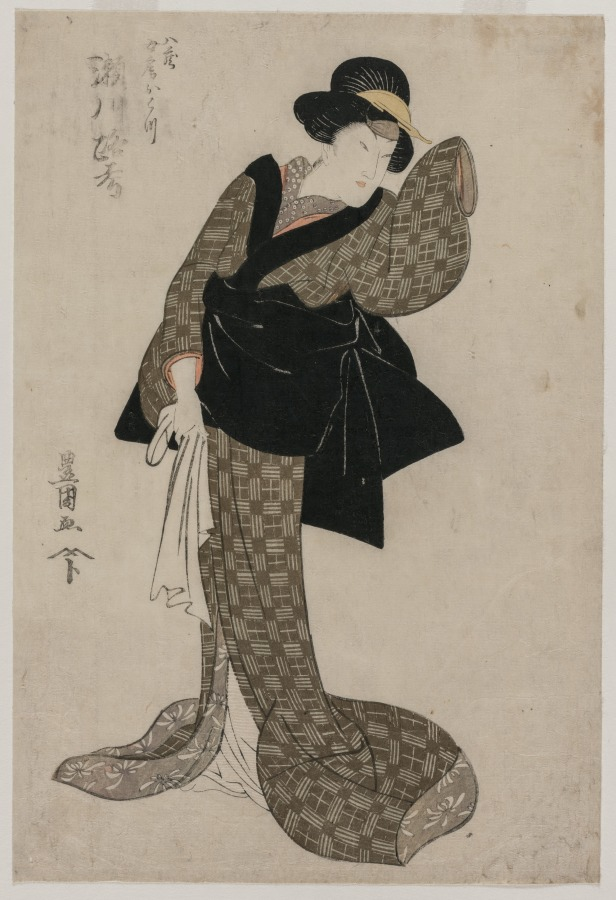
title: Segawa Roko as Hachizo's Wife Ohatsu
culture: Japan, Edo period (1615–1868)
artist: Utagawa Toyokuni (Japanese, 1769–1825)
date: c. 1805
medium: color woodblock print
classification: Print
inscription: Signature: Toyokuni ga